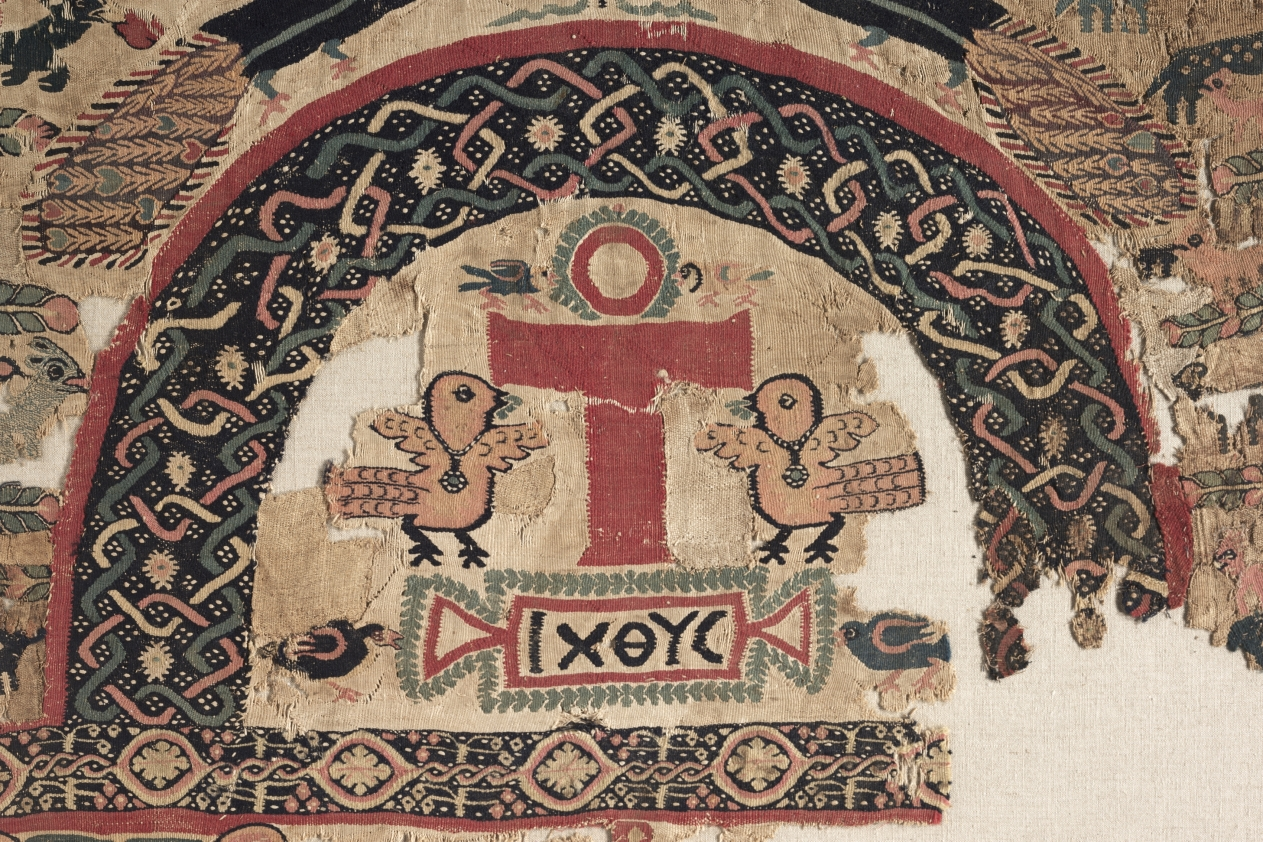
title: Hanging with Christian Images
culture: Egypt, Byzantine period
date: 500s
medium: dyed wool, undyed linen: plain weave (tabby) with inwoven tapestry weave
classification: Textile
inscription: inscribed below the ankh cross: IXOYC.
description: This rare surviving hanging with Christian symbols likely served as a wall decoration in a church or a home. The three men who stand beneath an arch may represent the three Hebrews who refused to worship a golden idol, and when cast into the fiery furnace, remained unharmed due to God’s deliverance (Daniel 3:19–30). Above them is a Christogram formed by the first two letters of Christ’s name in Greek, X (chi) and P (rho), flanked by the letters for alpha and omega. Beneath the arch, an ankh, an ancient Egyptian symbol of life, is framed by two birds. Another Christogram appears above the arch between two peacocks. The significance of the combined use of these images and symbols lies in their invocation of Christ’s redemptive and life-giving power.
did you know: The two peacocks in the upper half of this composition represent immortality. Ancient Greeks and Romans believed that the body of the peacock did not decay after death and when this imagery was adopted by Christianity, the bird came to be associated with resurrection.